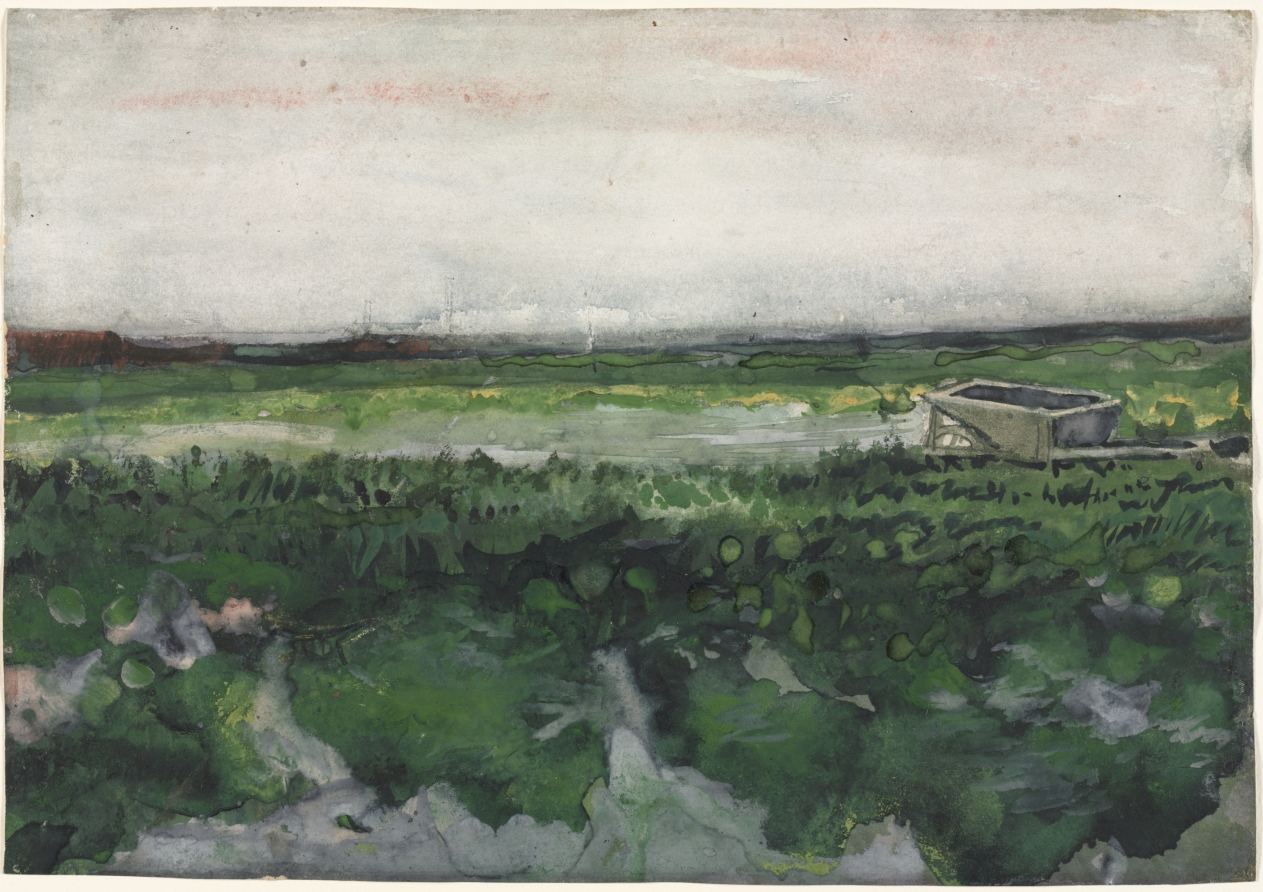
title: Landscape with Wheelbarrow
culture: Netherlands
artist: Vincent van Gogh (Dutch, 1853–1890)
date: 1883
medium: watercolor and opaque watercolor with black chalk on cream paper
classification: Drawing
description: In September 1883 Van Gogh left the bustling Dutch city of The Hague in search of open countryside in which to paint. He moved to Drenthe, a village in northeastern Netherlands that was virtually untouched by the Industrial Revolution. He described the barren terrain as supremely beautiful and serene: "What tranquility, what expanse, what calmness in this nature." With a limited palette of steely greens and cool blues, Van Gogh masterfully portrayed one of the region’s expanses of heath—"a vast plane vanishing into infinity"—illuminated by the lilac hues of the evening sky.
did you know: Vincent van Gogh made this watercolor just over a year after beginning to work professionally as an artist.